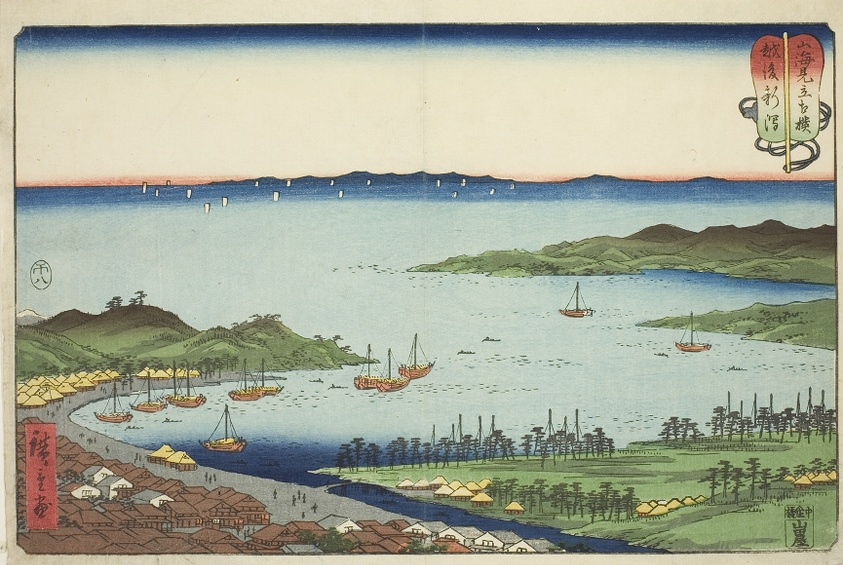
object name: Print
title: Niigata in Echigo Province (Echigo Niigata), from the series "Wrestling Matches between Mountains and Seas (Sankai mitate zumo)"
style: Japanese (culture or style)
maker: Utagawa Hiroshige 歌川 広重; Japanese, 1797-1858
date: 1858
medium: Color woodblock print; oban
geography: Japan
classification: woodblock print; print; asian art